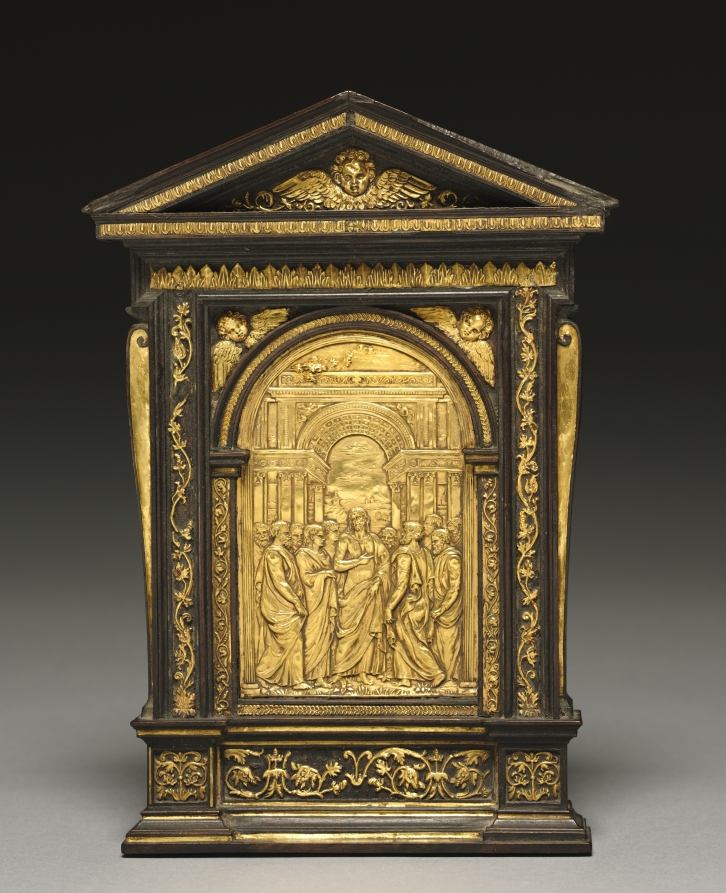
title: Pax with Christ Appearing to the Apostles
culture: Germany, late 16th century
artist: cast after a model by Valerio Belli (Italian, c. 1468–1546)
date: late 1500s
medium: gilt bronze in ebony frame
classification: Sculpture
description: A pax is a tablet depicting a sacred subject that a priest held out to be kissed during the Mass. The scene on this tablet is of Christ preaching to ten apostles. The image is by an unknown artist who based it on a plaquette by the gem engraver and medalist Valerio Belli (1468–1546) and demonstrates an awareness of linear perspective and scale conventions common in Renaissance Italy. The triumphal arch seen behind the figures, for example, contains coffering and Corinthian capitals that have been present in Italian art since the early 1400s. The arch itself is supported by columns in order to reveal the landscape behind it. The foliage seen at the top of the arch and at the figures' feet, however, is not present in the Belli and suggests the stylistic influence of northern Europe. The plaquette's gilding may have been intended to create painterly effects on a low-relief metal surface. The work is encased inside an ebony frame. The wood used for the frame—and the three putti heads it contains—suggests origins in southern Germany, possibly Nuremberg or Augsburg. The frame is also decorated with vine and floral patterns, which could originate in either medieval tapestries or northern European manuscripts.